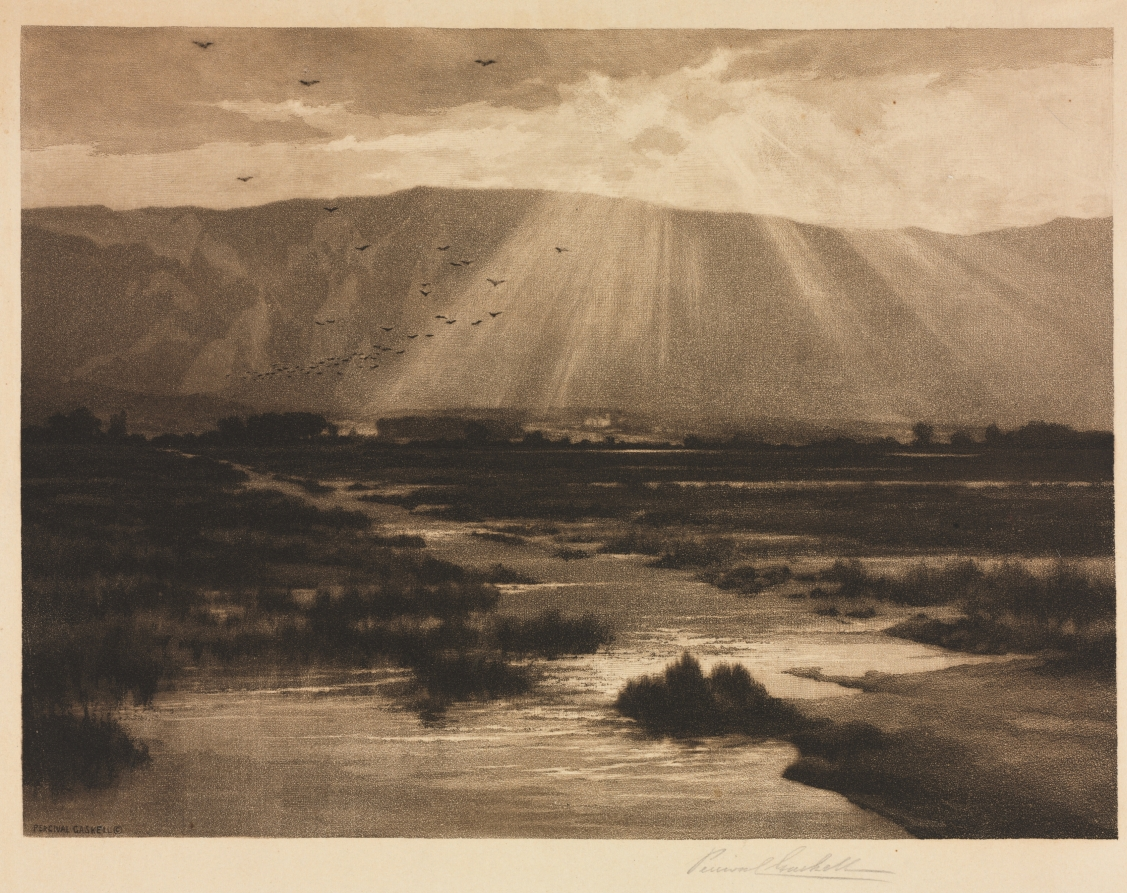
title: Landscape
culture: England, 19th-20th century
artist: George Percival Gaskell (British, 1868–1934)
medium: aquatint with etching and roulette on chine collé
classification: Print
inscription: signed lower right, in pencil: "Percival Gaskell"